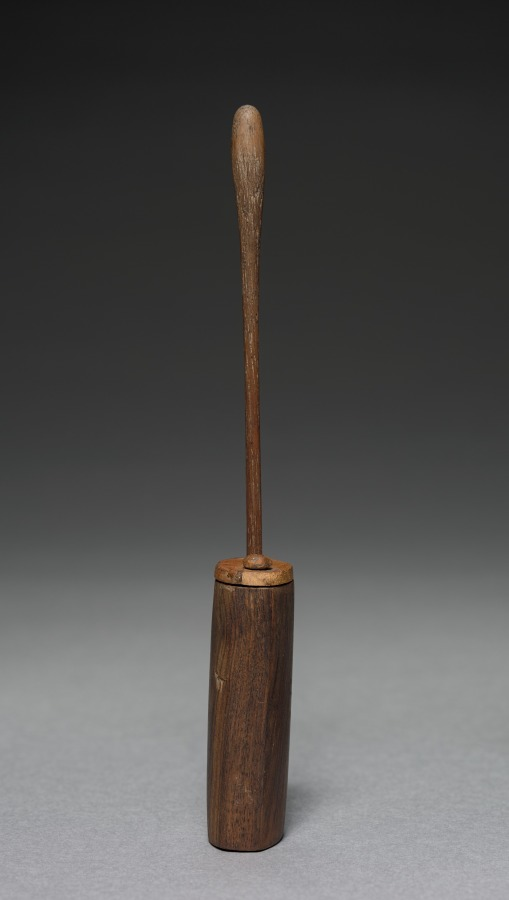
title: Kohl Container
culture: Egypt, New Kingdom (1540–1069 BCE), Dynasty 18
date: 1540–1296 BCE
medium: wood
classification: Cosmetic Objects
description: Cosmetic vessels would have once contained scented oils or ointments used for beautifying the body, while kohl containers held the eye paint seen in many depictions of ancient Egyptians. Galena, a mineral used in eye paint, helped reflect the sun and repelled insects and tiny organisms that could cause eye disease and blindness. Cosmetics were an essential element of daily life and associated with upholding the ancient Egyptians’ high standards of cleanliness.